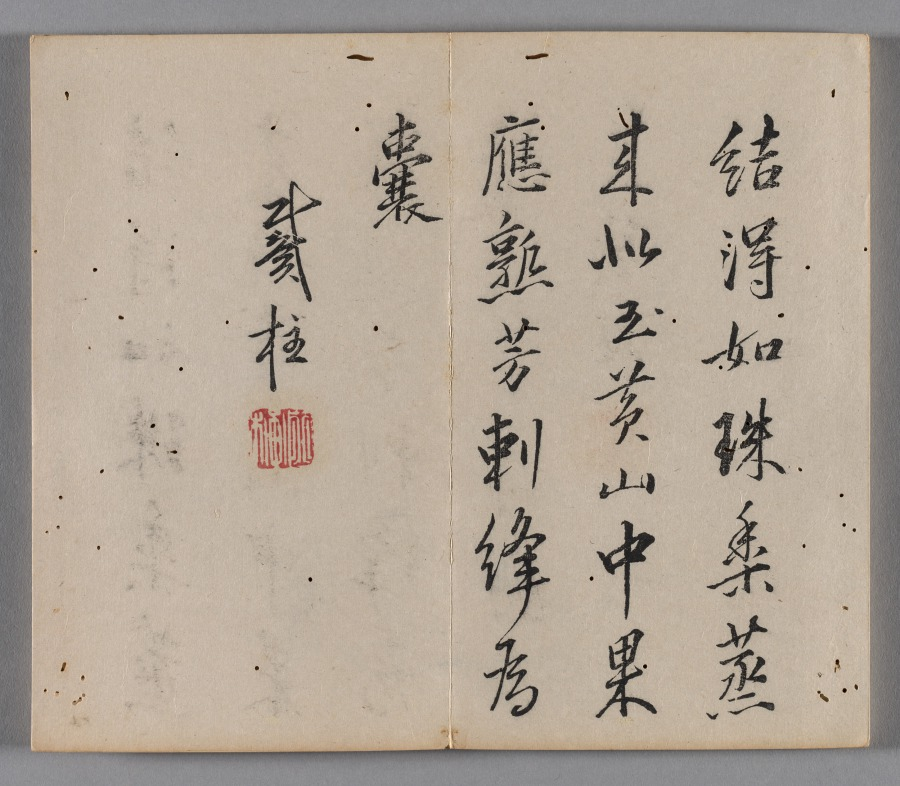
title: Ten Bamboo Studio Painting and Calligraphy Handbook (Shizhuzhai shuhua pu): Fruit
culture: China, Qing dynasty (1644-1911)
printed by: Hu Zhengyan (Chinese, c. 1584–1674)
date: 1633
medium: Woodblock-printed book; ink and colors on paper; first edition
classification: Print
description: Color printing reached a level of perfection in the early 1600s, as seen in this Ten Bamboo Studio Collection of Calligraphy and Painting and the Mustard Seed Garden Manual of Painting (printed 1679 and 1701). The painterly quality, precision in registering (aligning) the woodblocks, and harmonious colors made them the most successful color print editions in Chinese history. Both editions were printed and compiled in Nanjing, spread nationwide, and had a great impact on the arts in Japan and Korea.